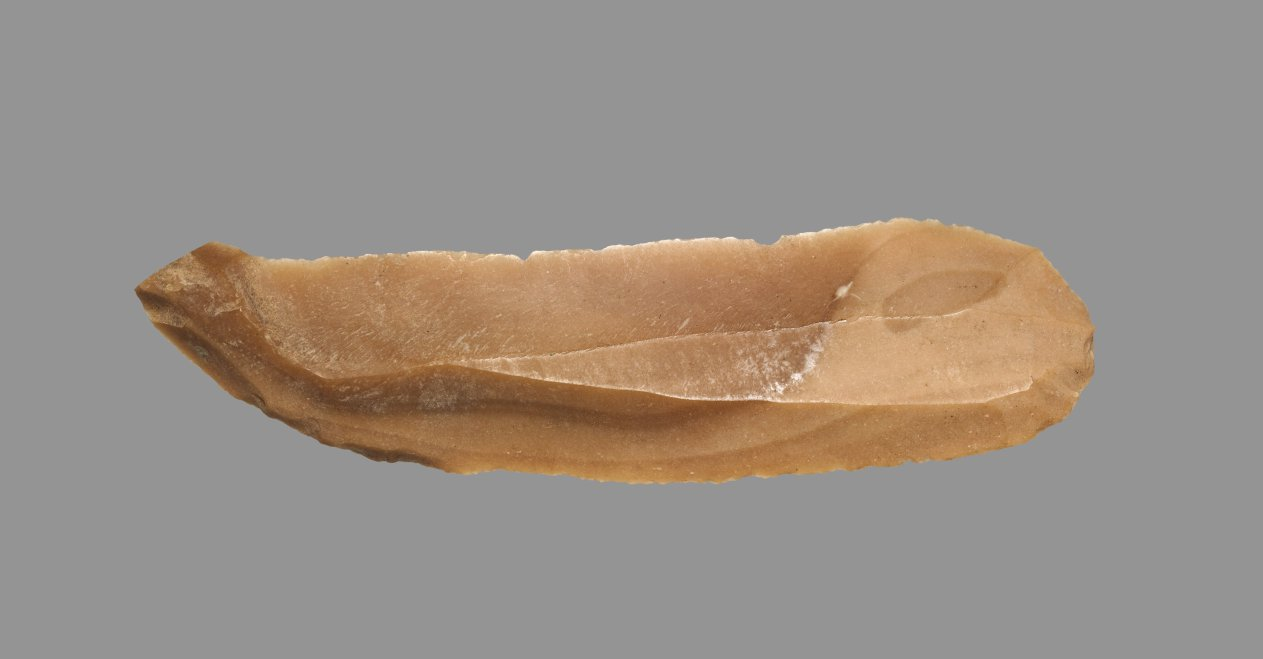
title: Sickle Blade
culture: Egypt, Middle Kingdom (2040–1648 BCE), Dynasty 12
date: 1980–1801 BCE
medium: flint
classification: Implements